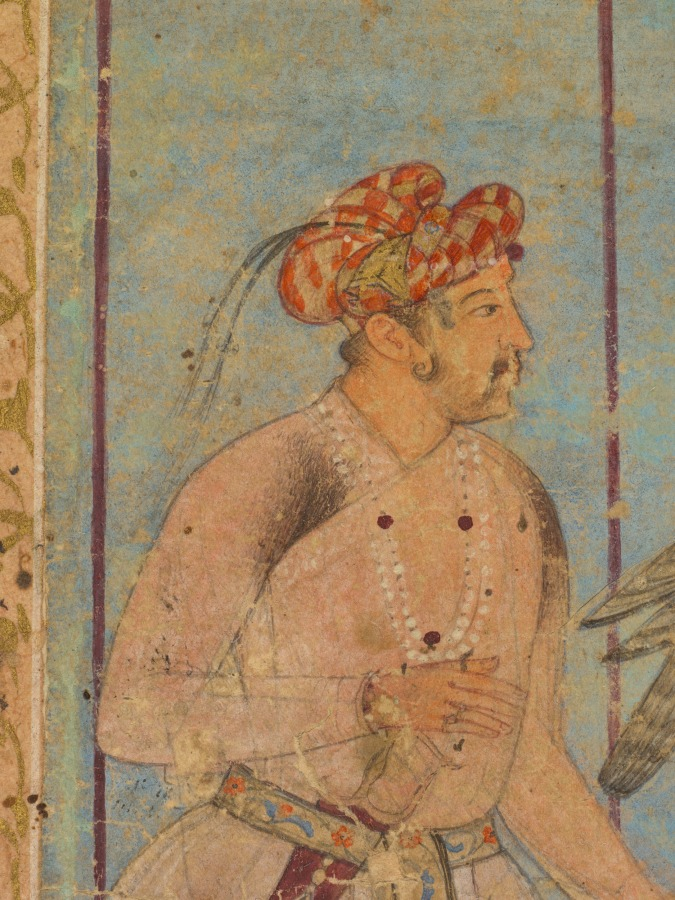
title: Akbar and Jahangir Examine a Ghir Falcon while Prince Khusrau Stands Behind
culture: Mughal India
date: c. 1602–4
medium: gum tempera and gold on paper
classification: Painting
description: Emperor Akbar sits against a purple bolster under a canopy looking aged and careworn, probably not long before his death. He examines a trained falcon of the type that the Mughals used in hunting. This falcon appears to be from Akbar’s son, Prince Salim, who stands before him in a gesture of gift-giving. A stately black antelope, a wild animal now a pet, harnessed and wearing a bell, crouches at the foot of the steps leading up to the canopied platform.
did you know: Salim rests his hand on a sharply pointed dagger in a red velvet sheath.